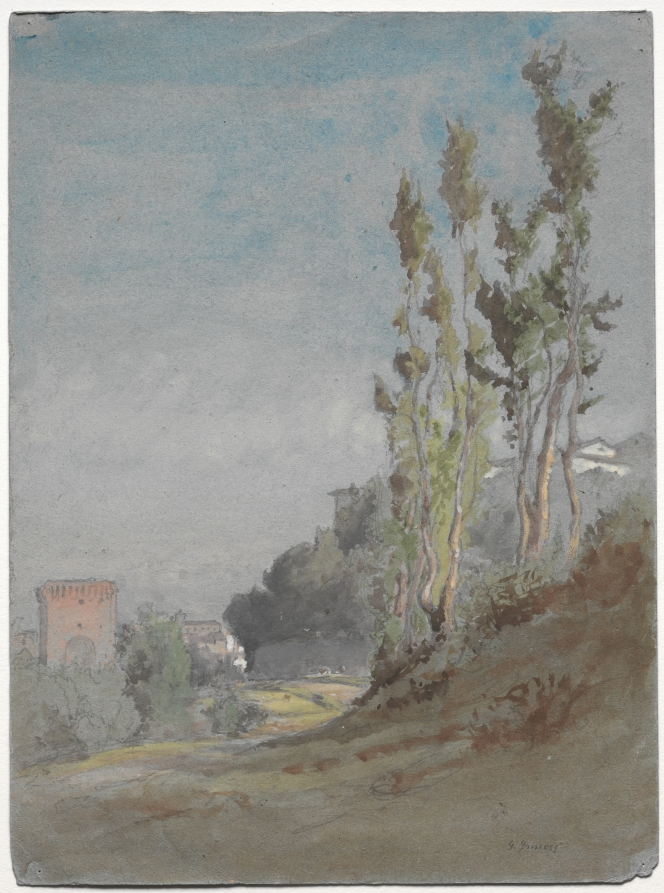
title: Albano, Italy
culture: America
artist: George Inness (American, 1825–1894)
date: c. 1872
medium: watercolor with gouache over graphite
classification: Drawing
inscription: Signed, lower right, in graphite: "G. Inness"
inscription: verso, by unknown hand, in graphite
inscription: Upper left: "No 11"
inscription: Lower left, in graphite: "No 21 [crossed out] 16 [circled]"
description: This lyrical drawing on brilliant blue paper was done on a trip to Italy, where George Inness made a series of watercolor sketches of the Italian countryside in the vicinity of Albano. In contrast to the precision of his earlier Hudson River school paintings, in the early 1870s his work achieved a new freedom. This drawing is reminiscent of a classical Italian landscape, illustrating a broad expanse with a road winding through an Italian village, complete with framing trees in the foreground and ancient fortifications in the background. Inness made this drawing by applying wet washes one on top of another, intentionally creating a blurred effect, like that of a memory from the distant past.